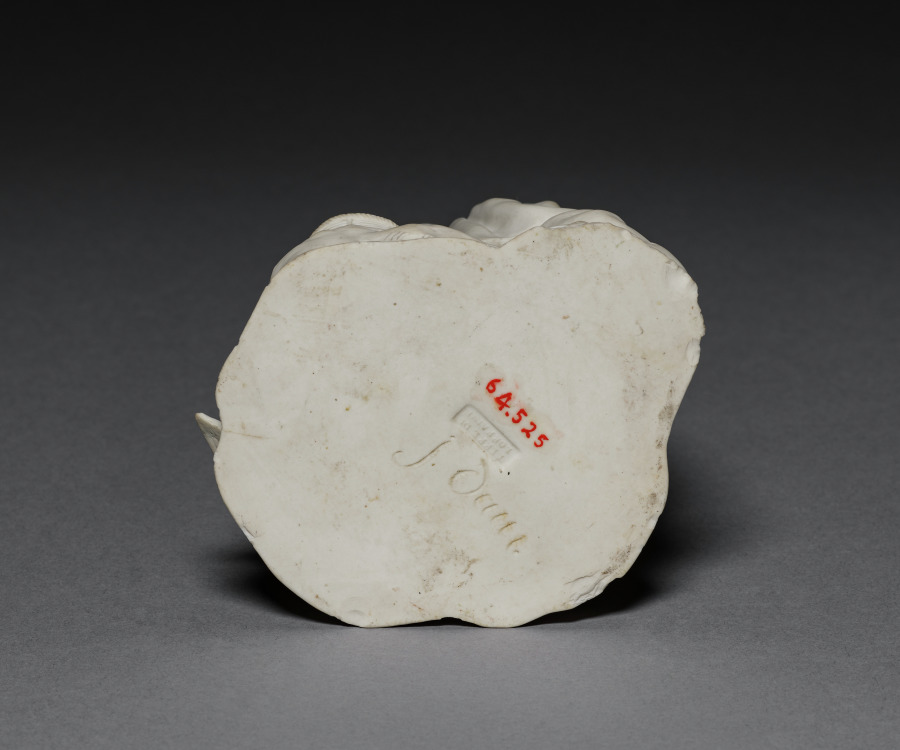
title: Curiosity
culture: France, Lunéville, 18th century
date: c. 1770–1775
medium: pipe clay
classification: Ceramic